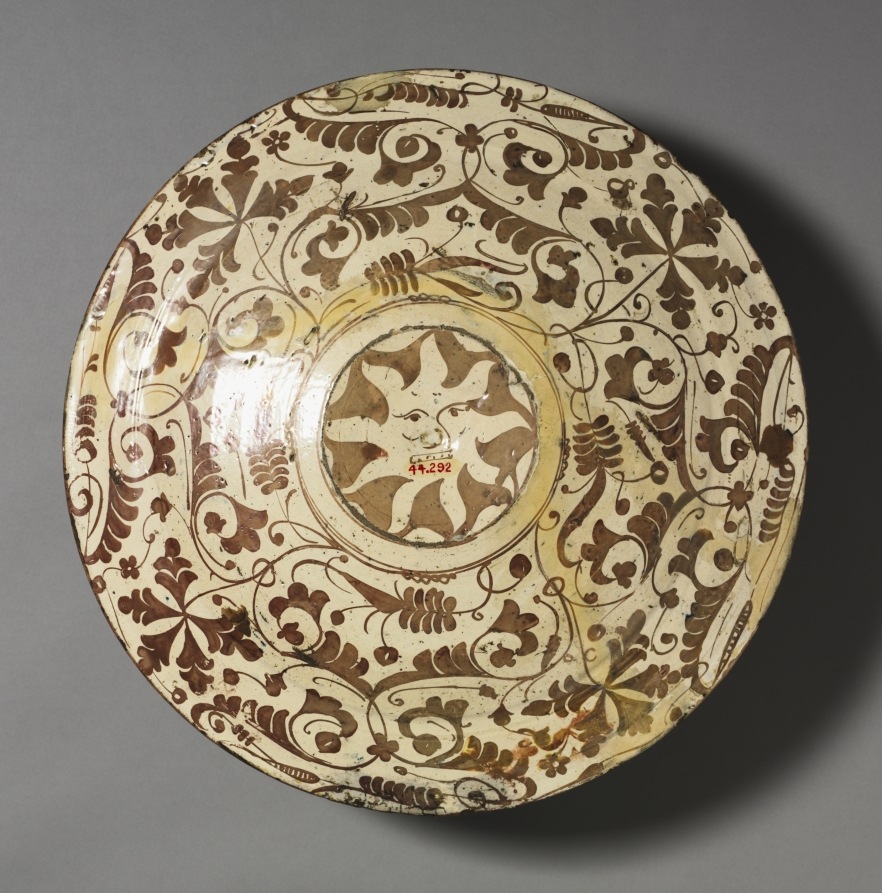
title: Plate with the Name "Maria"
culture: Spain, Valencia, 15th century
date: c. 1437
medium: tin-glazed earthenware, gold lustre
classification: Ceramic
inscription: in center, on front: Maria.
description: Large ornamental plates in this Valencian style became so renowned that personalized examples were ordered not only by Spanish patrons, but also by others in Italy and France. The heraldry and name displayed on this plate suggest that it might commemorate the wedding in 1437 of Marie de Bourbon and Jean, Duke of Calabria.